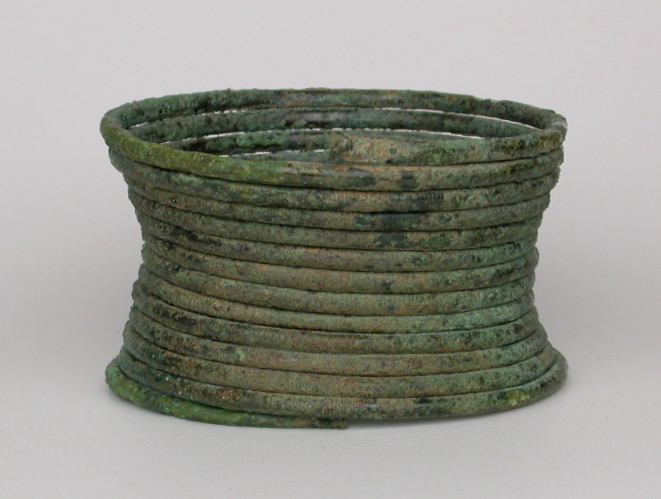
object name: Costume and Accessories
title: Bracelet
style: greek, ancient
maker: Greek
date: about 8th century BCE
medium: Bronze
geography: Greece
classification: bracelet (jewelry); bronze; metal; jewelry; ancient art; costume